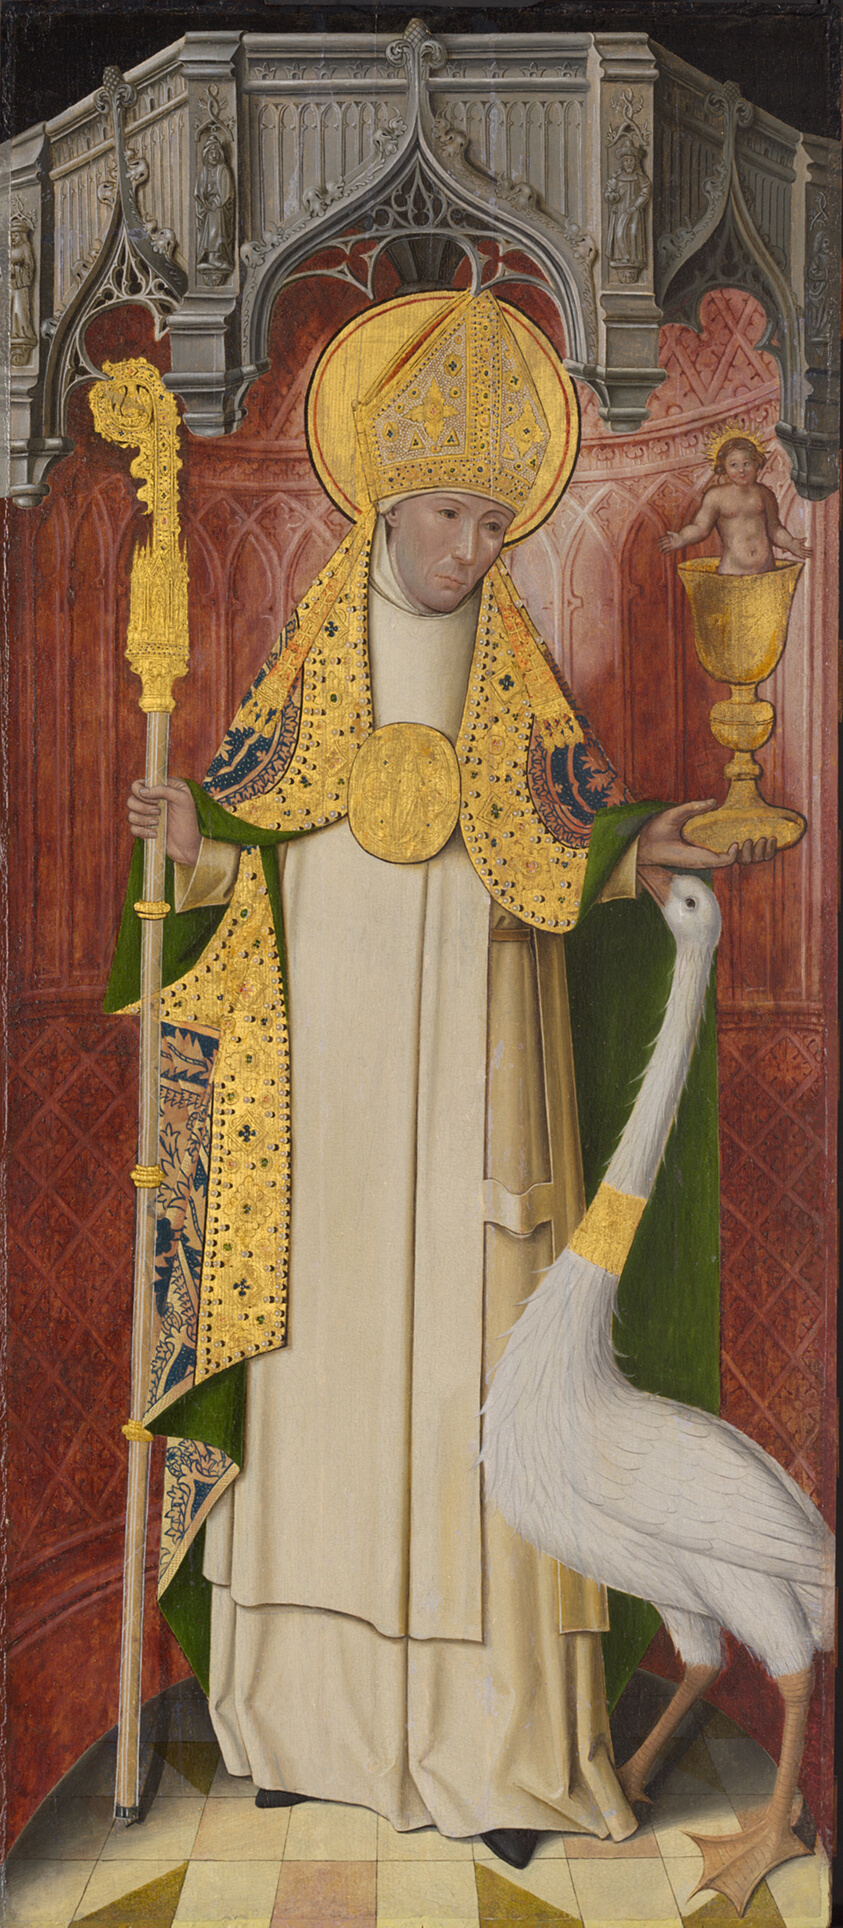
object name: Painting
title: Altarpiece from Thuison-les-Abbeville: Saint Hugh of Lincoln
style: 15th century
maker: French; Picardy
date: c. 1495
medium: Oil on panel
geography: France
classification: oil on panel; altar; france; french; oil paintings (visual works); paint; painting; european painting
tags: saints, altar, architechture, architecture, architecture, bird, Christian subjects, Christianity, cup, French, men, religion, religious, religious attire, vestments, Century of Progress, world's fairs, Chicago World's Fairs